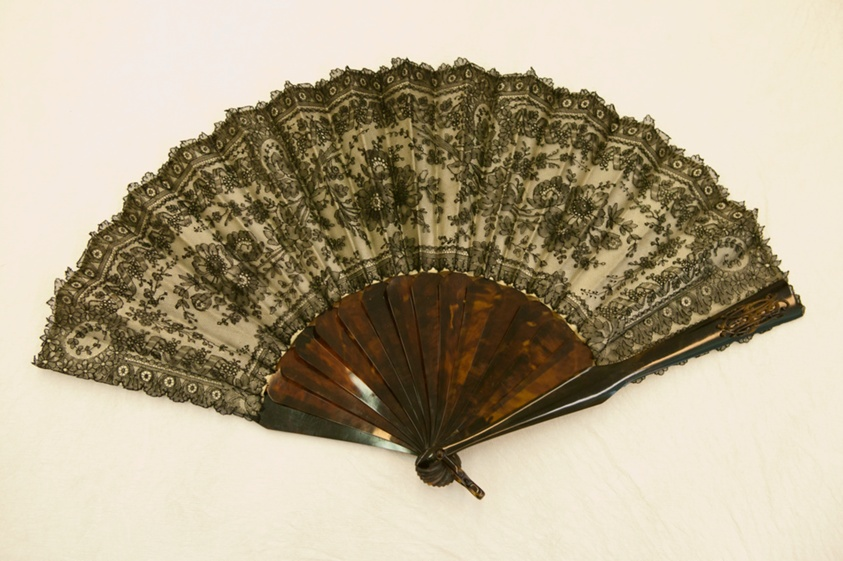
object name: Costume and Accessories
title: Fan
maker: France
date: 1860/70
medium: Silk, bobbin straight lace backed by silk 7:1; satin weave; lined with silk, plain weave; tortoise shell guards, sticks, rivet and loop; black on white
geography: France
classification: textile; fan - lace; costume accessory - folding fan; costume accessory; costume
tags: fashion